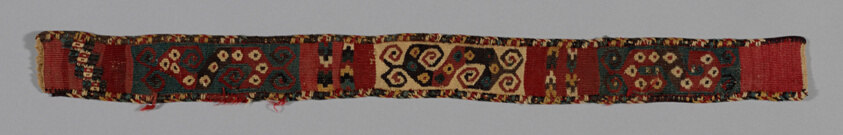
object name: Textile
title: Fragment (Headband)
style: Pre-Columbian, andean, andes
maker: Wari (Probably central or south coast, Peru)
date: A.D. 600/900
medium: Interlocking and slit tapestry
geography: Peru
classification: textile; weaving